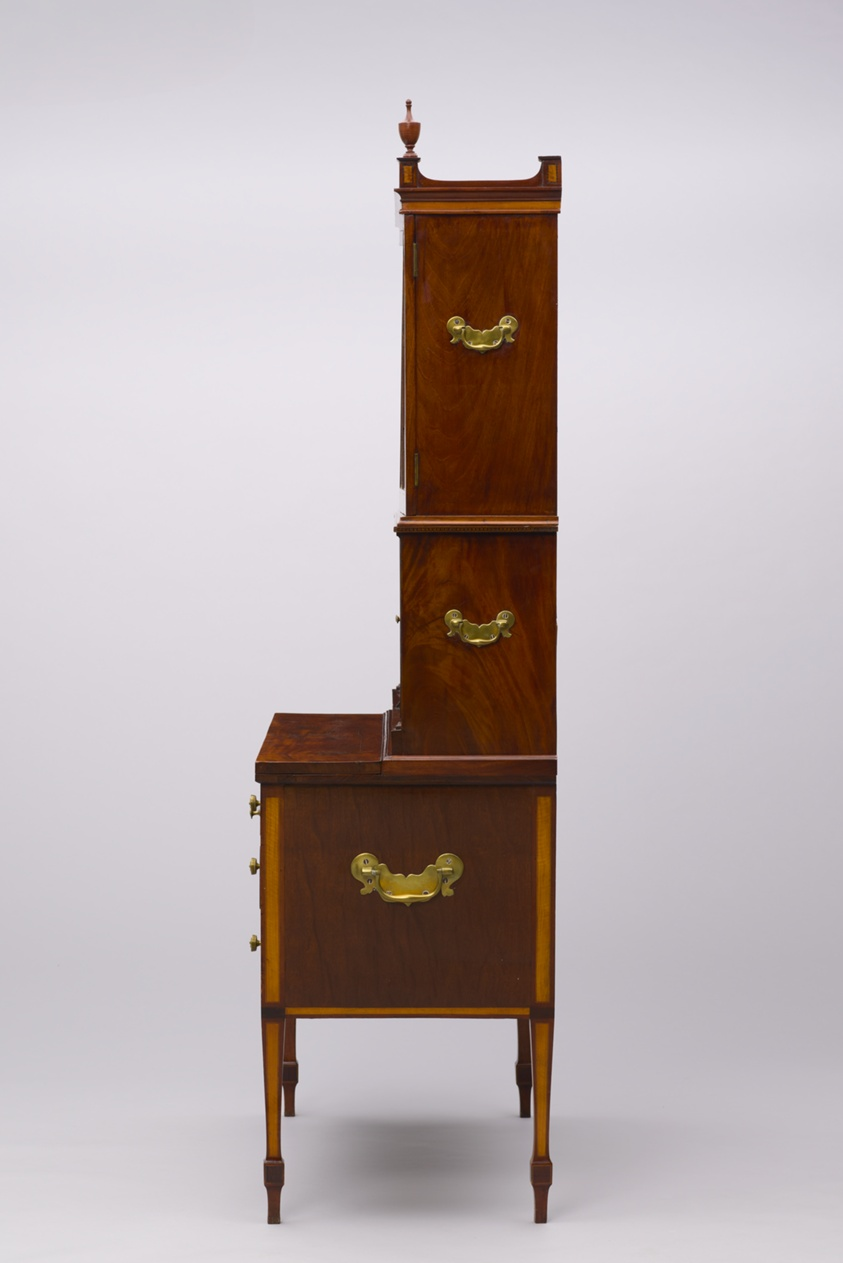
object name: Furniture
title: Tambour Desk and Bookcase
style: federal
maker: Attributed to the workshop of John and Thomas Seymour (American, active 1793–1804); Or attributed to the workshop of Thomas Seymour (American, active 1804–1817); Boston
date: c. 1800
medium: Mahogany, satinwood, white pine, cherrywood, chestnut, with brass, ivorine, and leather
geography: Boston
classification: furniture; american arts; american decorative arts; bookcase; decorative arts; desk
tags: furniture, cabinets, shelves, drawer, locks, keys, bookcase, decorative arts, desk, escutcheons